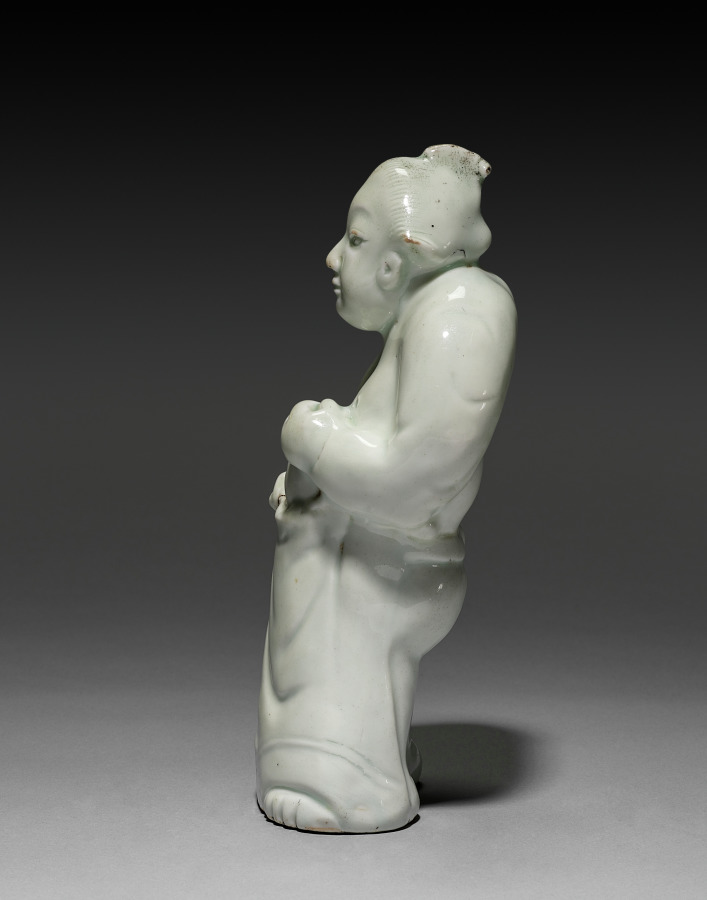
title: Standing Figure of a Sumo Wrestler, Arita Ware (?)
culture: Japan, Edo period (1615–1868)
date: 1700s-1800s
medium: porcelain, molded and carved, with celadon overglaze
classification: Sculpture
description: Catalogue of the Severance and Greta Millikin Collection (CMA, 1990): 85, no. 137.